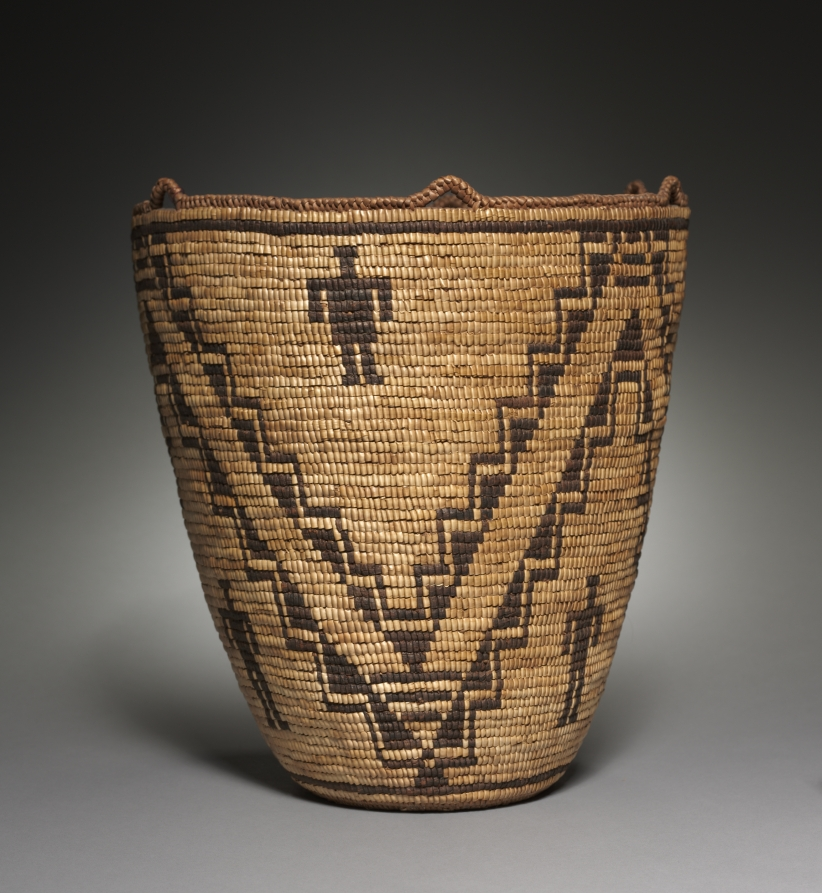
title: Burden Basket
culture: Native North American, Pacific Northwest, Plateau, Klickitat people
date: c.1900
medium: horsetail fragments on cedar rool; coiled, imbricated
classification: Basketry